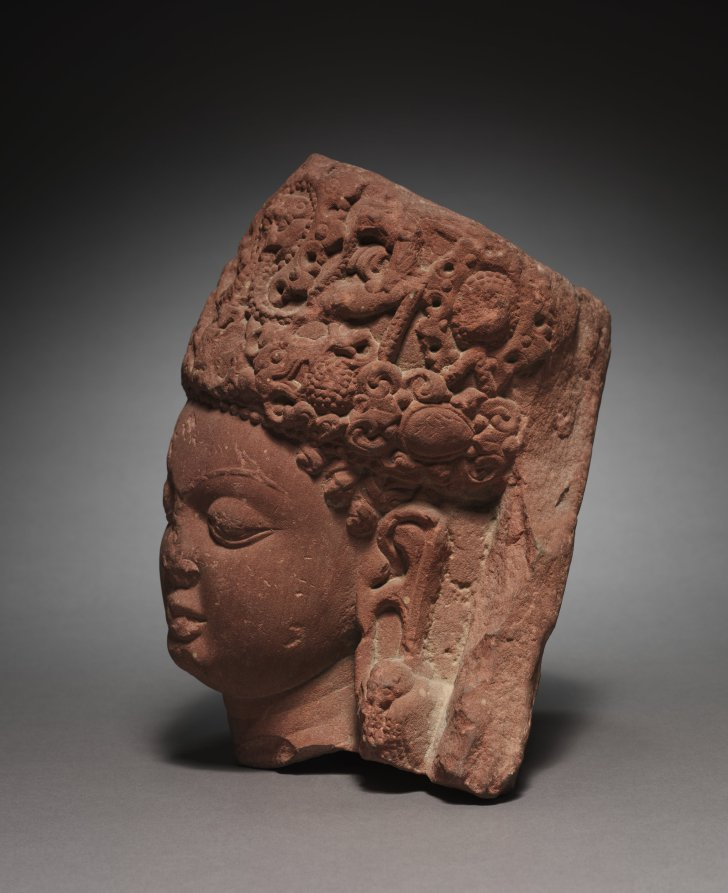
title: Head of Vishnu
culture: Northern India, Uttar Pradesh, Mathura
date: 400s CE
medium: sandstone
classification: Sculpture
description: During this period in India, the Hindu god Vishnu wears a distinctive squarish crown with a central medallion featuring a lion head. With strings of pearls issuing from his mouth, the imagery conveys the idea of radiance and glory. Devotees recognized Vishnu as having solar and royal attributes. His coiled ringlets of hair and heavy earrings also indicate that he was meant to have the appearance of a royal warrior.